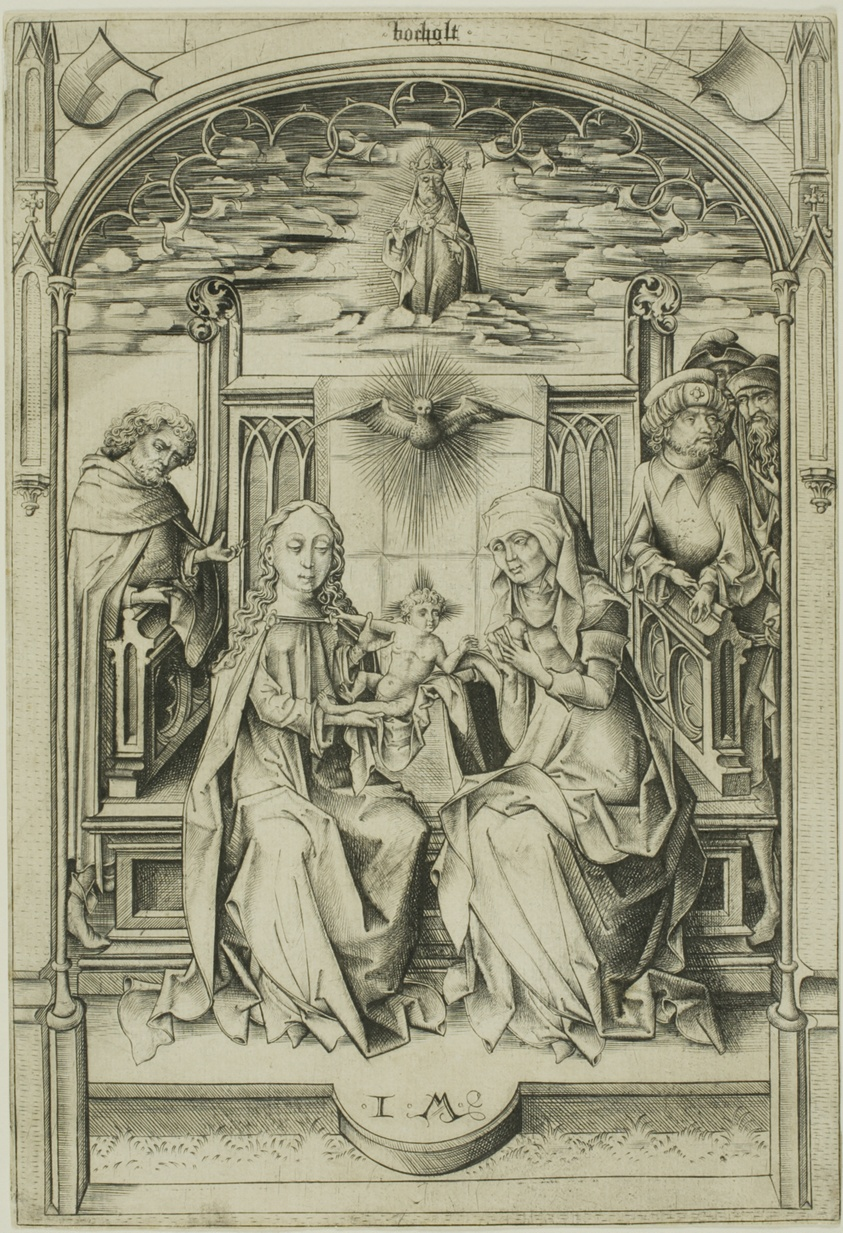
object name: Print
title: The Holy Family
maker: Israhel van Meckenem the Younger; German, c. 1440/45-1503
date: 1475/85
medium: Engraving on ivory laid paper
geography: Germany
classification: engraving; print; prints and drawing